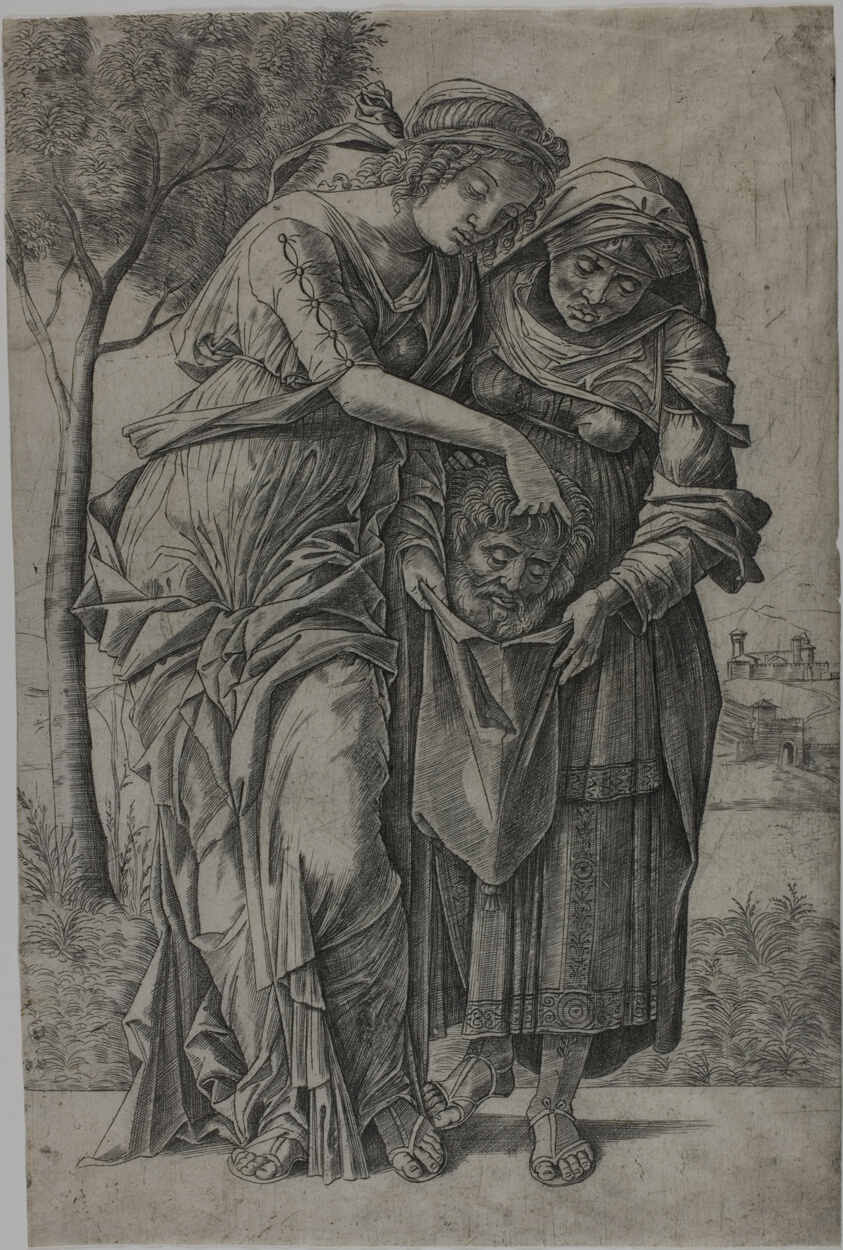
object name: Print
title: Judith with the Head of Holofernes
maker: Girolamo Mocetto (Italian, c.1470-after 1531); after Andrea Mantegna (Italian, 1431-1506)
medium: Engraving in black on ivory laid paper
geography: Italy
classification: engraving; print; prints and drawing